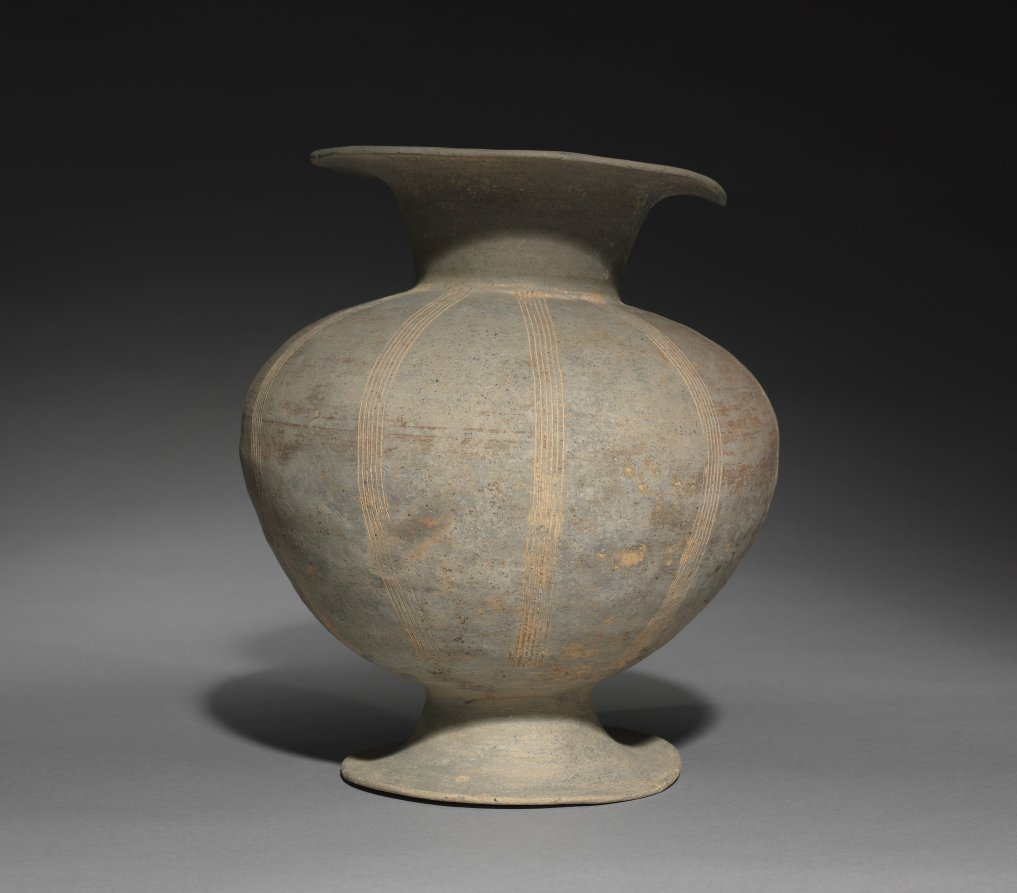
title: Pedestaled Vessel with Incised Band Design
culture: Korea, Proto-Three Kingdoms period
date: 300s CE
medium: earthenware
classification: Ceramic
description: This pedestaled earthenware was a product of closed kilns built on hillsides, which became widely used for producing this type of pottery vessel in Korea during the Three Kingdoms period. Both its gray color and shimmering glaze are the result of the reduction of oxygen in the closed kiln chamber. Due to its relatively tall pedestal, this vessel may have been used for more for ritual settings than everyday use.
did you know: This pedestaled earthenware may have been used for ritual offerings to ancestors.